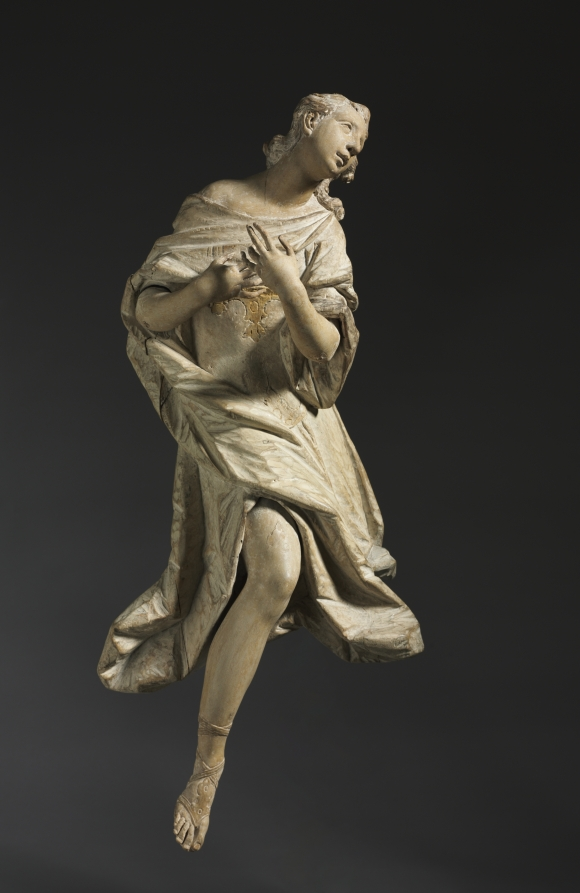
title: Kneeling Angel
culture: Germany, Munich, 18th century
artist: Ignaz Günther (German, 1725–1775)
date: c. 1760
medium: gessoed and painted wood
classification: Sculpture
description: This angel, and another now in the Philadelphia Museum of Art, were probably originally placed on either side of a tabernacle—a structure designed to hold the consecrated bread and wine of the Eucharist—on an altar in a Christian church or private chapel. The angels would originally have had wings, and the now plain surface of the sculpture would have been painted or gilded. Ignaz Günther was among the most sought-after carvers of religious sculpture in southern Germany. His virtuoso skill is particularly evident here in the angel’s pious expression and elegantly formed hands and feet.